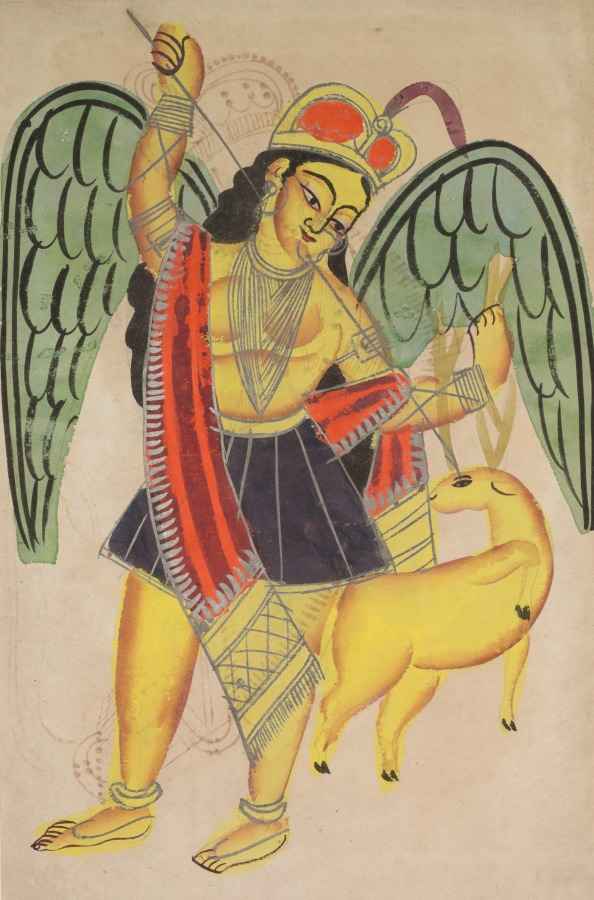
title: Diana or Artemis, Goddess of the Hunt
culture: Eastern India, Bengal, Kolkata, Kalighat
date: c. 1890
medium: Gum tempera, graphite, ink, and tin on paper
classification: Painting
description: An adaptation of the Greek goddess Artemis or Roman goddess Diana, goddess of the hunt, this winged fairy wears a British crown and a short skirt and carries a spear. Like Diana/Artemis, the stag is presented on her left. Her hair resembles that of other Hindu goddesses.